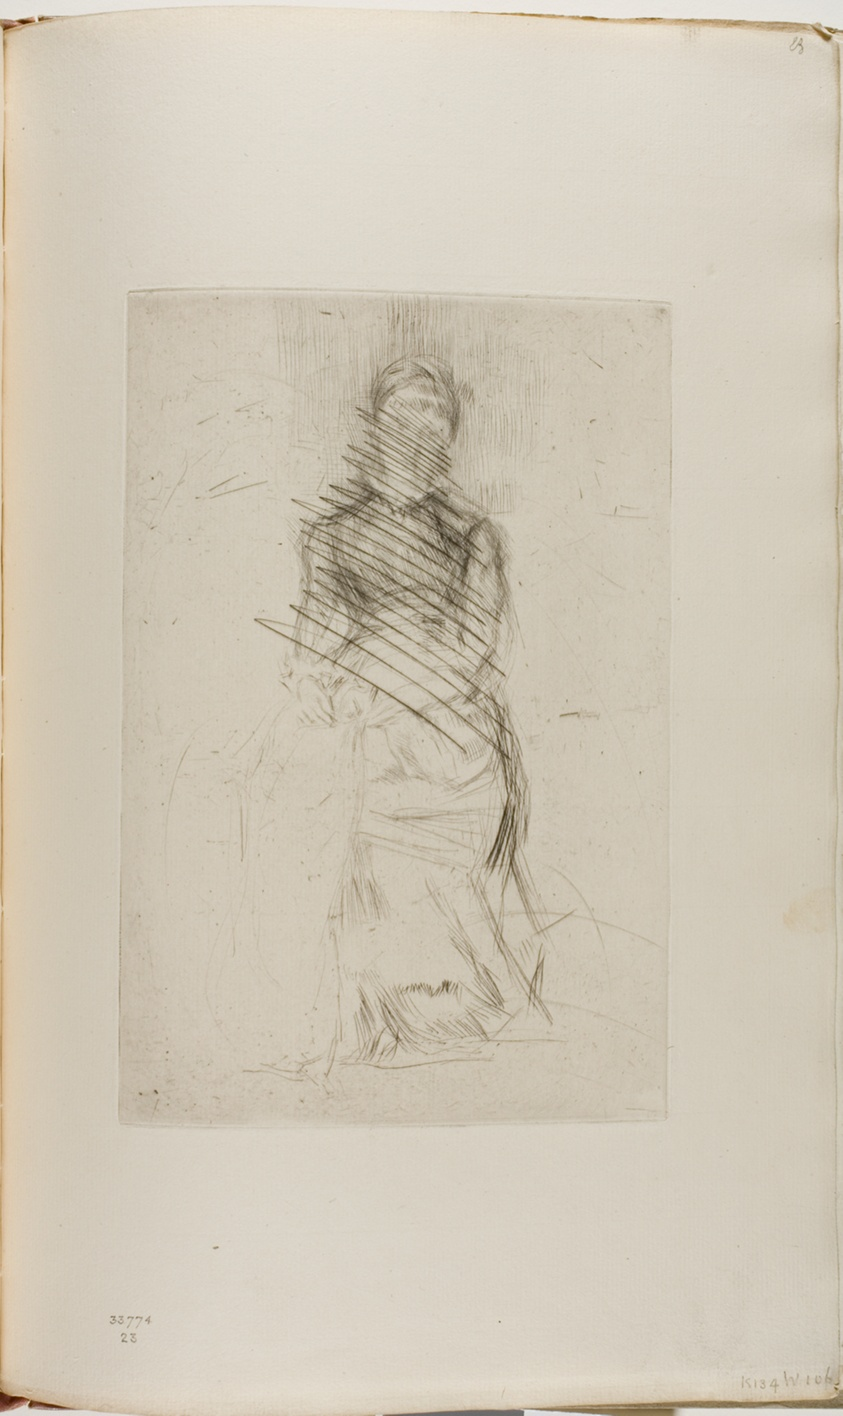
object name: Print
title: Agnes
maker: James McNeill Whistler (American, 1834-1903)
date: 1875/78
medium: Drypoint with foul biting, with drypoint cancellation, in black ink on ivory laid paper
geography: United States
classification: drypoint; prints and drawing; book; foul biting; print; paper